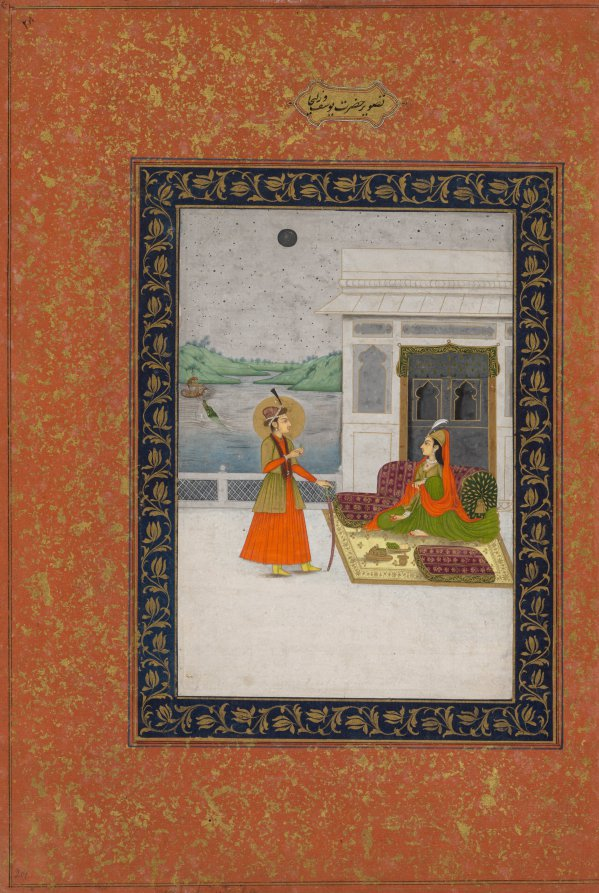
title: Yusuf and Zulaykha meeting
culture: India, Provincial Mughal, Lucknow, 18th century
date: c. 1764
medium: Gum tempera, ink, and gold on paper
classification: Painting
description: Joseph, called Yusuf in Arabic and Persian sources, had been thrown into a well by his jealous older brothers. Although his eldest brother intended to return and rescue him, Joseph was taken by a caravan and brought to Egypt to be sold as a slave. When Zulaykha saw Joseph in the market, she recognized him as the lover she had seen in her dreams since childhood and so purchased him for herself. When read as a religious allegory, Zulaykha’s passionate desire for Joseph is interpreted as the yearning of the soul to be joined with the perfect beauty of God.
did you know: Joseph wears a Central Asian fur-trimmed hat and coat and holds Indian paan.